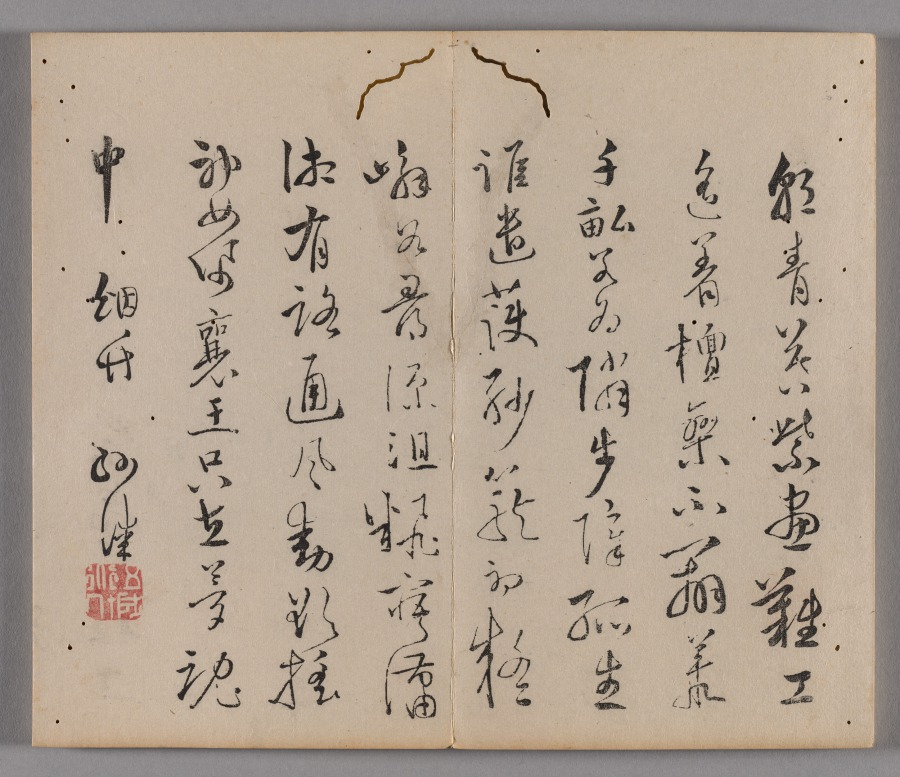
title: Ten Bamboo Studio Painting and Calligraphy Handbook (Shizhuzhai shuhua pu): Bamboo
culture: China, Qing dynasty (1644-1911)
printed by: Hu Zhengyan (Chinese, c. 1584–1674)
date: 1633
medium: Woodblock-printed book; ink and colors on paper; first edition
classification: Print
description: Color printing reached a level of perfection in the early 1600s, as seen in this Ten Bamboo Studio Collection of Calligraphy and Painting and the Mustard Seed Garden Manual of Painting (printed 1679 and 1701). The painterly quality, precision in registering (aligning) the woodblocks, and harmonious colors made them the most successful color print editions in Chinese history. Both editions were printed and compiled in Nanjing, spread nationwide, and had a great impact on the arts in Japan and Korea.